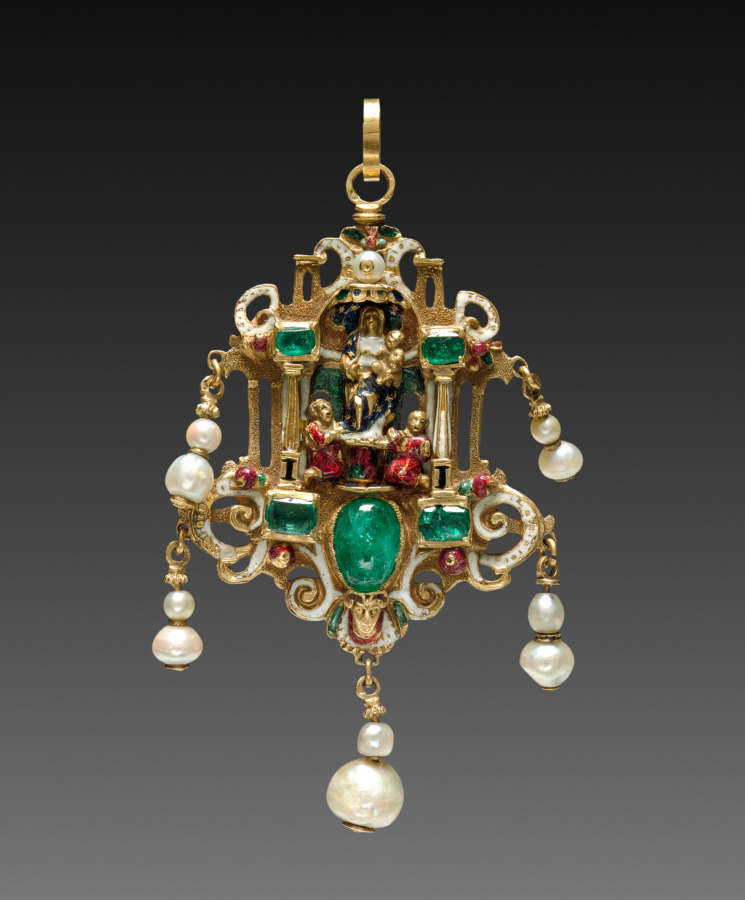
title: Pendant with Virgin and Child with Saints (obverse)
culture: Italy, late 16th century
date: late 1500s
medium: enameled gold with pearls and emeralds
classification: Jewelry